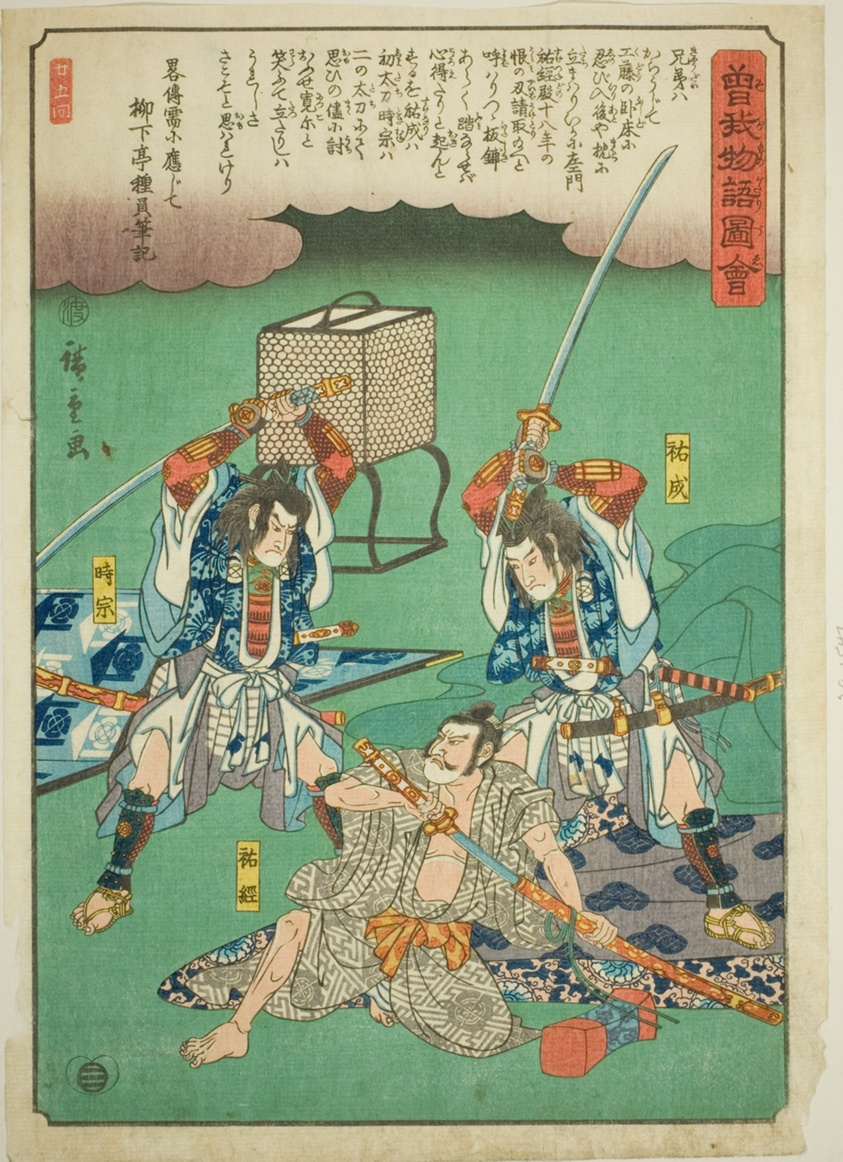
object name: Print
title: Sukenari (Soga no Juro) and Tokimune (Soga no Goro) assasinating Suketsune, from the series "Illustrated Tale of the Soga Brothers (Soga monogatari zue)"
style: Japanese (culture or style)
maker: Utagawa Hiroshige 歌川 広重; Japanese, 1797-1858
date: c. 1843/47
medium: Color woodblock print; oban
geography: Japan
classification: woodblock print; print; asian art